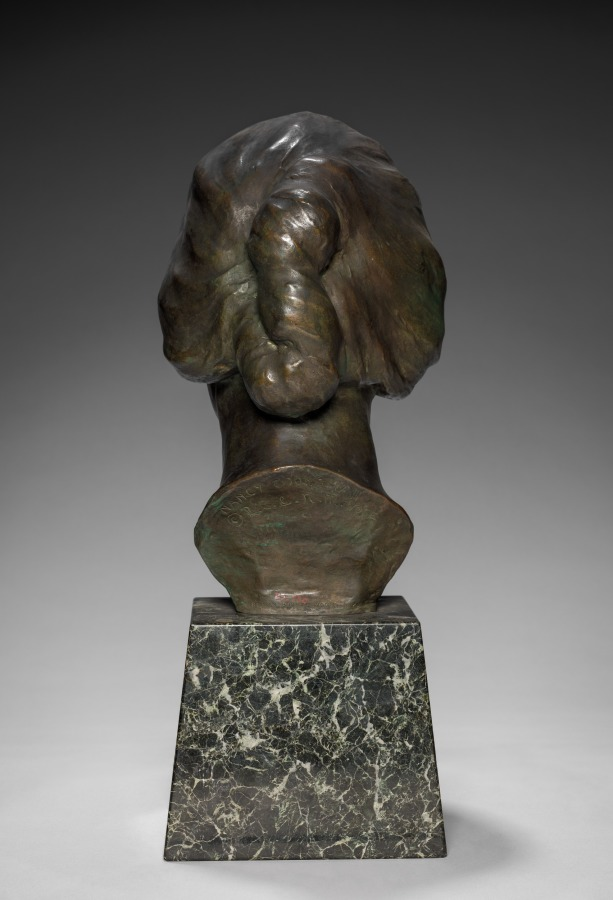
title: Head of a Girl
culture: America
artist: Nancy Coonsman (American, 1888–1920)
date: c. 1920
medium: bronze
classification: Sculpture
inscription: signed back of neck: Nancy Coonsman © R.C. & N.M. Vose/Roman Bronze Works New York.